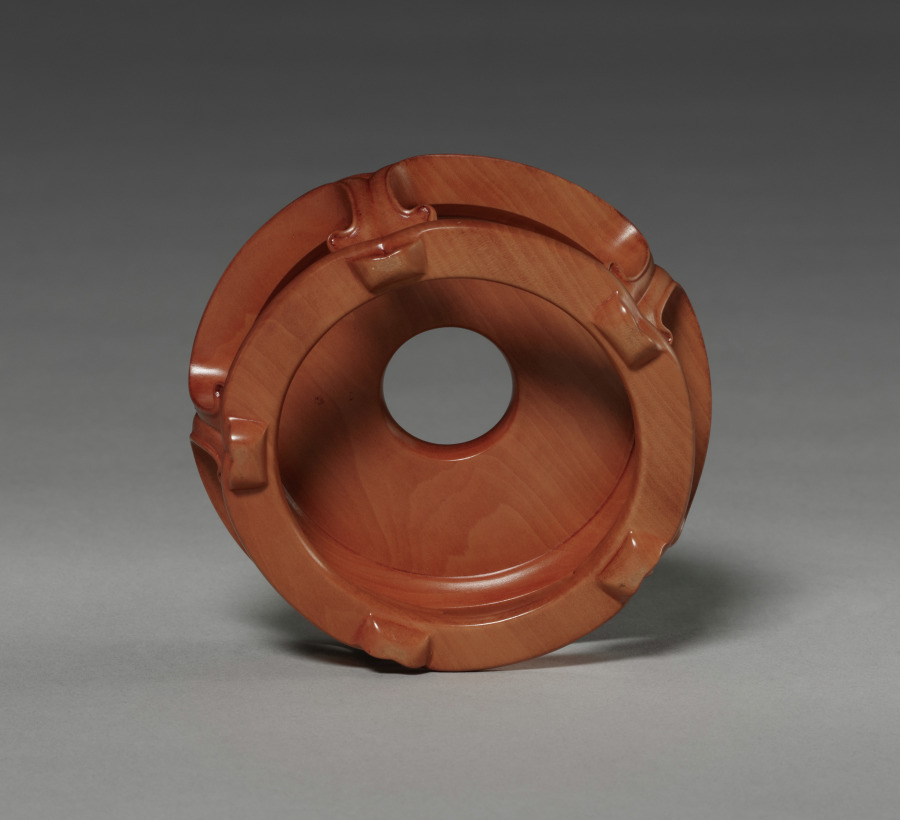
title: Covered Jar (stand)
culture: China, Jiangxi province, Jingdezhen kilns, Ming dynasty (1368-1644), Wanli reign (1573-1620)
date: 1573–1620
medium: porcelain with blue underglaze decoration and overglaze enamels in red, green, and yellow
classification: Wood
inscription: Six character "nien hao" enclosed by double ring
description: In the Ming (1368–1644) and Qing (1644–1911) dynasties, luxury items became more affordable to larger parts of the society, including women, merchants, and literati in non-official positions. Imperial patronage and a growing urban population encouraged consumption of luxury goods and local craftmanship. This covered porcelain jar has blue underglaze and overglaze in red, green and blue enamels. It shows Ming dynasty advancements in porcelain decoration and the creative mind of the talented artisans who made it.